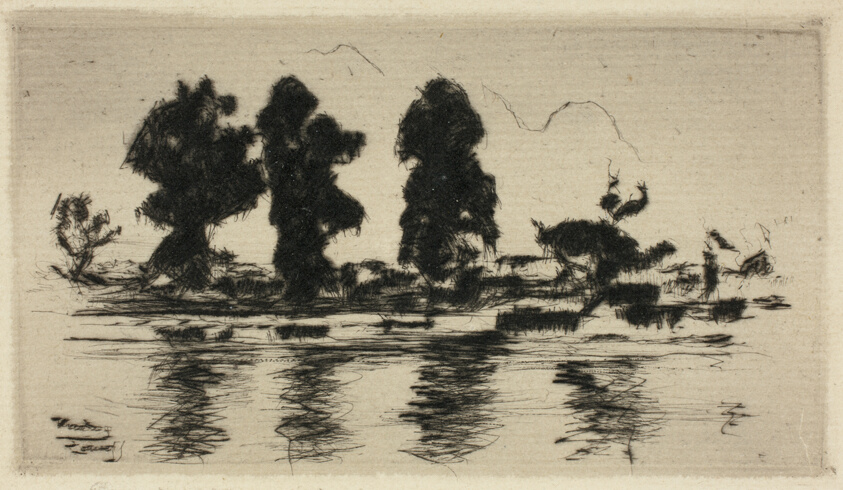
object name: Print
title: The Thames, Evening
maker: Theodore Roussel (French, worked in England, 1847-1926)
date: 1897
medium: Etching and drypoint in black, with plate tone, on cream laid paper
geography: England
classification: etching; paper; print; prints and drawing